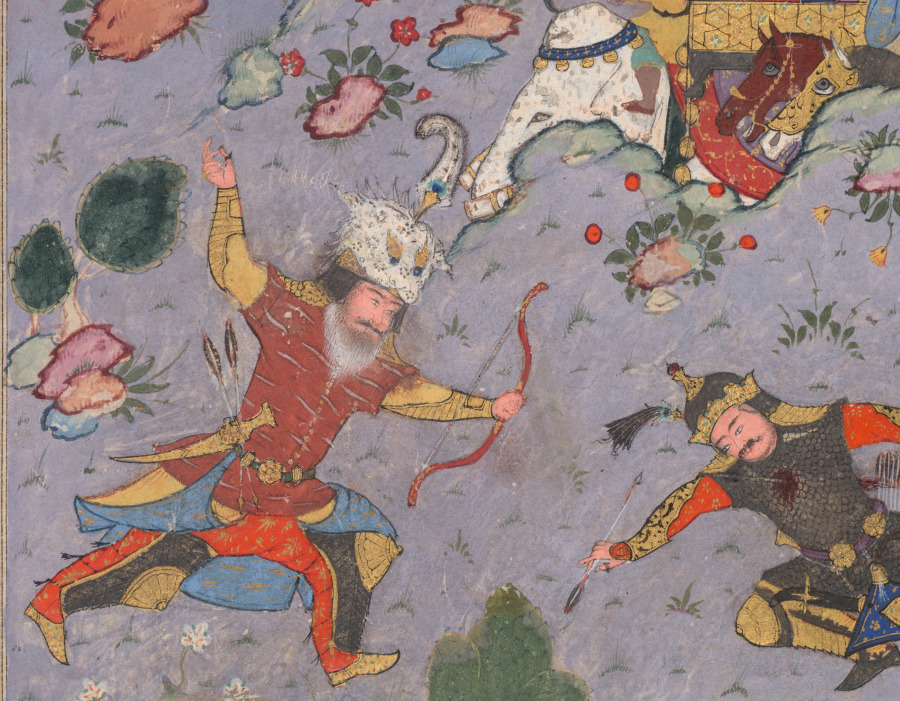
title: Rustam meets the challenge of Ashkabus, from a Shah-nama (Book of Kings) of Firdausi (Persian, about 934–1020)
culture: Iran, Shiraz, Safavid period (1501-1722)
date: c. 1590–1600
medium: opaque watercolor and gold on paper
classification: Manuscript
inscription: Script: none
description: Iran was losing a battle against Turan and the armies of its assembled allies from India and China. The hero Rustam arrived to pull the Iranian army back from the brink of destruction, slaying the enemy warrior Ashkabus on foot while allowing his horse Rakhsh to rest after a long, hard journey. The vast number of armies involved in the battle is indicated by the many banners that extend beyond the illustration’s top border. This painting was probably produced at Shiraz, one of Iran’s major cultural centers, far to the south of the Safavid capital of Tabriz. Artists and works of art moved back and forth steadily between Shiraz and the Deccan in southwestern India during the 1500s and 1600s. The section of the Shah-nama on the recto is famous for the clever conversational repartee between Rustam and his opponent Ashkabus. When Ashkabus remarked that in choosing not to ride a horse Rustam had signed his own death warrant, Rustam retorted, “Would it be the case then that in your country . . . lions, tigers, and crocodiles [all] ride on horses to battle?” Rustam then brought down the horse of Ashkabus with a single arrow; his next arrow pierced Ashkabus in the chest.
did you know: The enemy ruler of China sits in a howdah on the back of a white elephant.